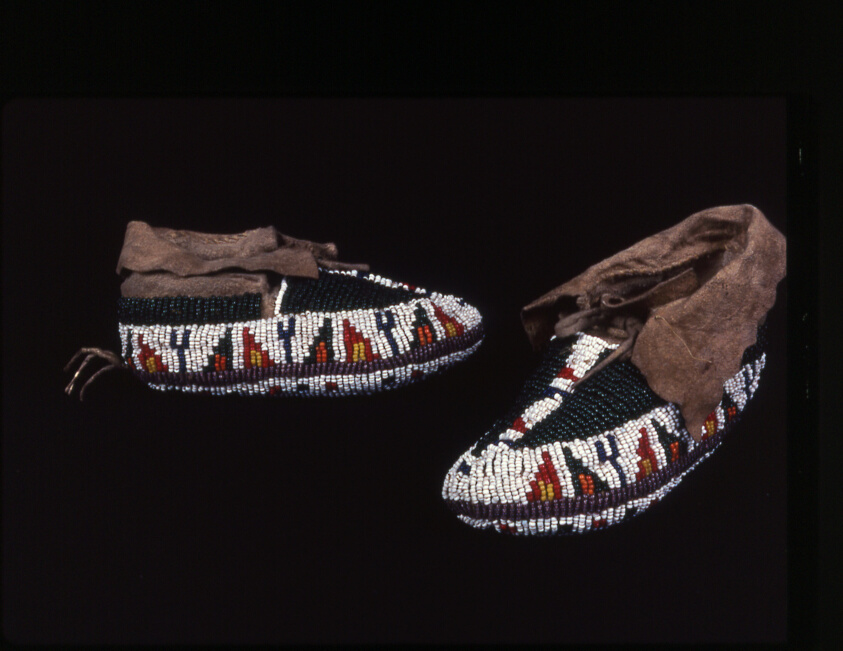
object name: Textile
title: Pair of Child's Moccasins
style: sioux, plains indian, native american, americas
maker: Sioux; Plains, North America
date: c. 1885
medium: Doe skin sewn with sinew; decorated with beads, including soles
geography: Plains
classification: textile; shoes - needlework; costume accessory - shoe; costume accessory; costume; dress (garment); clothing